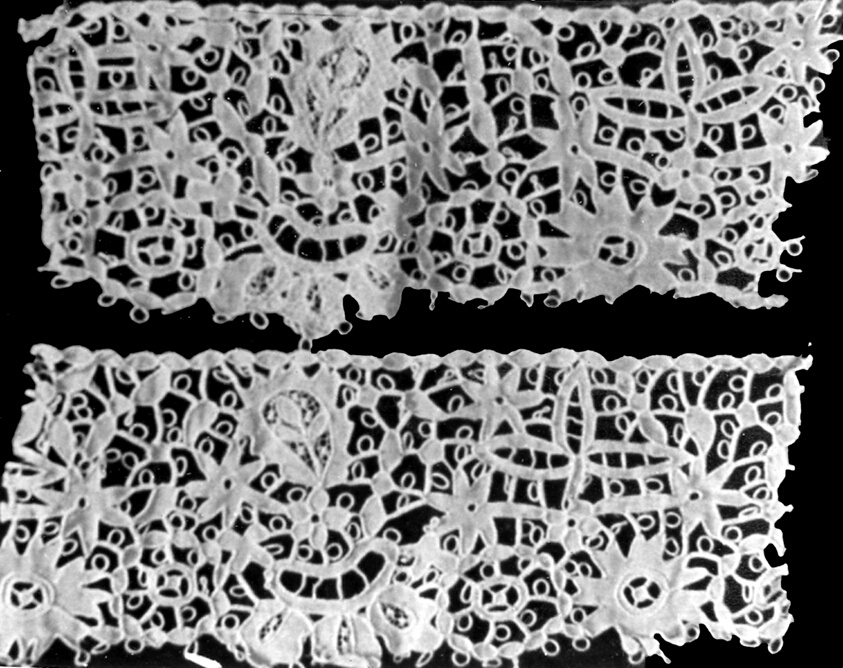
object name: Textile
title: Border and Two Fragments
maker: Ireland, Carrickmacross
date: 1850/1900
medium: Cotton, plain weave; cut work embroidered in couching and with buttonhole bars; appliquéd with machine-made net; embroidered with cotton in bead insertion stitches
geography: Carrickmacross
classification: textile; lace - mixed